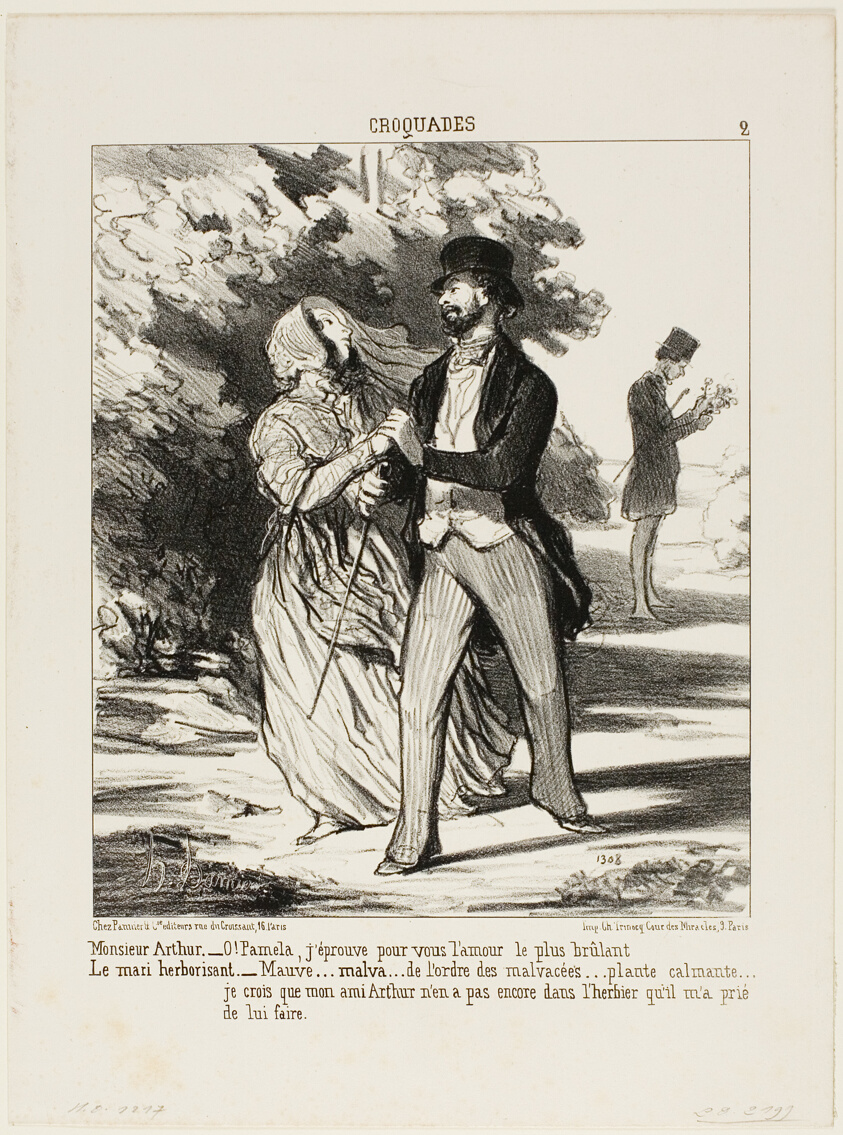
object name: Print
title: Monsieur Arthur: “- Oh Pamela! I am burning with love for you!” The husband herbalist: “- A mallow... of the family of Malvaceae... a sedative... I don't believe my friend Arthur has this specimen in the herbarium he asked me to build for him,” plate 2 from Croquades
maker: Honoré Victorin Daumier; French, 1808-1879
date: 1851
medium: Lithograph in black on white wove paper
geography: France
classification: lithograph; print; prints and drawing